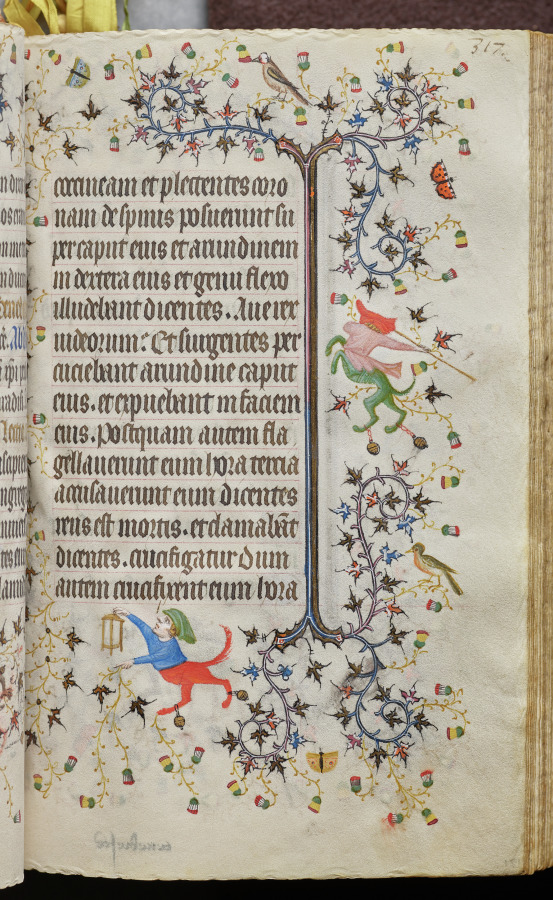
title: Hours of Charles the Noble, King of Navarre (1361-1425): fol. 159r, Text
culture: France, Paris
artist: Master of the Brussels Initials and Associates (French)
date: c. 1405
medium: ink, tempera, and gold on vellum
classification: Bound Volume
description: This precious volume was obviously highly prized by its owner, the French-born King of Navarre, who had his coat of arms painted on no less than twenty folios. Rather than directly commissioning this manuscript from a specific workshop, it seems that Charles the Noble acquired his book of hours -- perhaps ready-made for the luxury market -- while on a trip to Paris in 1404-05. A collaborative effort, six painting styles are evidenced within the pages of this codex, those of two Italians, two Frenchmen, and two Netherlanders. The painter who was responsible for the planning and decoration of the book, and who produced seventeen of the large miniatures, was a Bolognese artist known as the Master of the Brussels Initials. His principal assistant, responsible for most of the borders, was a Florentine who signed his name "Zecho" da Firenze on folio 208 verso.